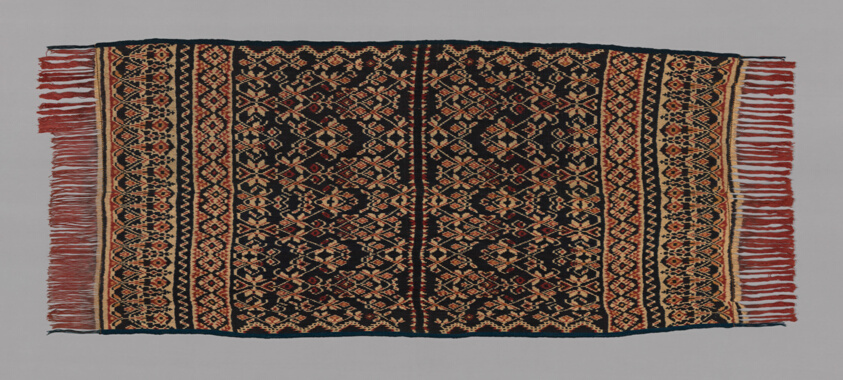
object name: Costume and Accessories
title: Selendang (Shawl)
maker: Indonesia, Roti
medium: Heavy cream colored cotton thread woven in two pieces and dyed in the loom by tie-dye process known as ikat; central field of dark blue is divided in center by two borders of red, white, ornamented in blue, red, yellow and cream; each end is finished with fringe dyed red above which are three borders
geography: Indonesia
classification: textile; weaving; costume; dress (garment); clothing